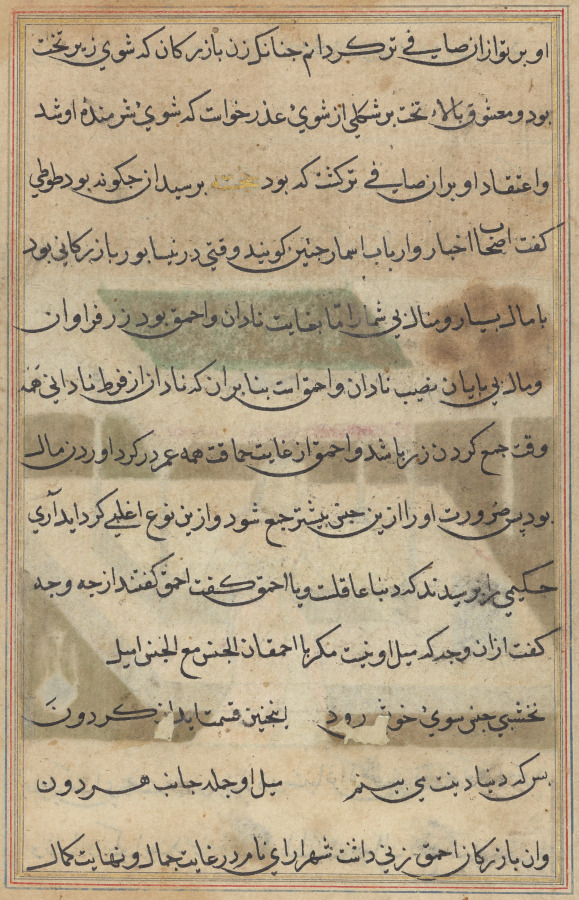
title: Page from Tales of a Parrot (Tuti-nama): text page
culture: Mughal India, court of Akbar (reigned 1556–1605)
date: c. 1560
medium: gum tempera, ink, and gold on paper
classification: Painting